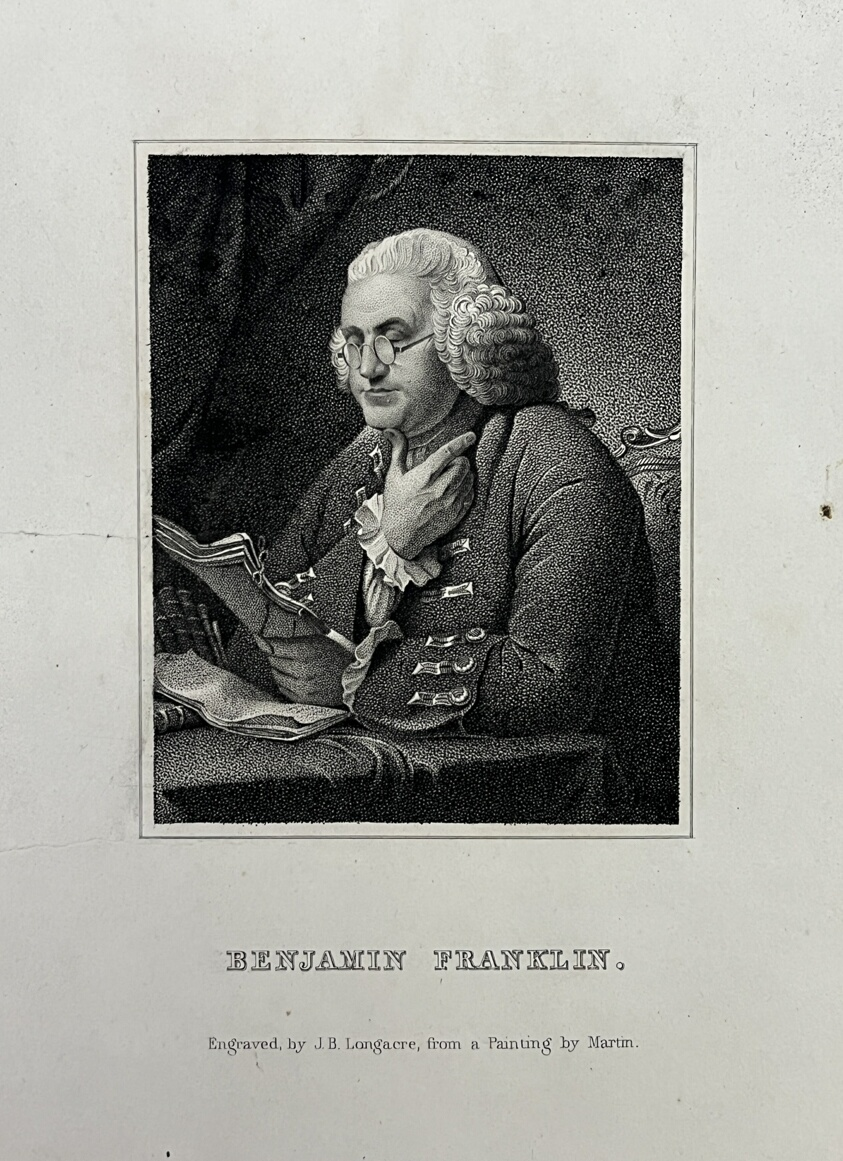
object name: Print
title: Benjamin Franklin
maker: James Barton Longacre (American, 1794-1869); after Martin (likely American, 19th century)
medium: Stipple engraving on paper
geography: United States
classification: reproduction; print; prints and drawing